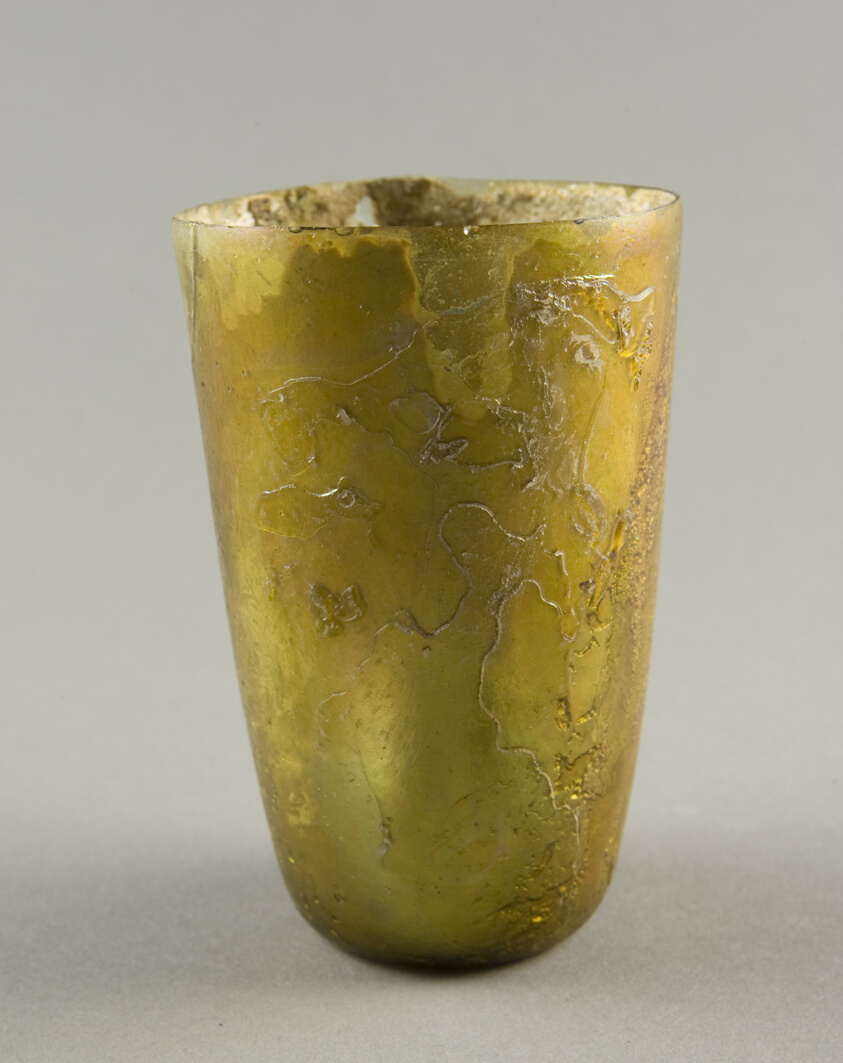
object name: Vessel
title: Beaker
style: syrian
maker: Roman, Levant or Syria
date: 1st century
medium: Glass, blown technique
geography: Syria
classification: drinking vessel; glass; vessel; ancient art